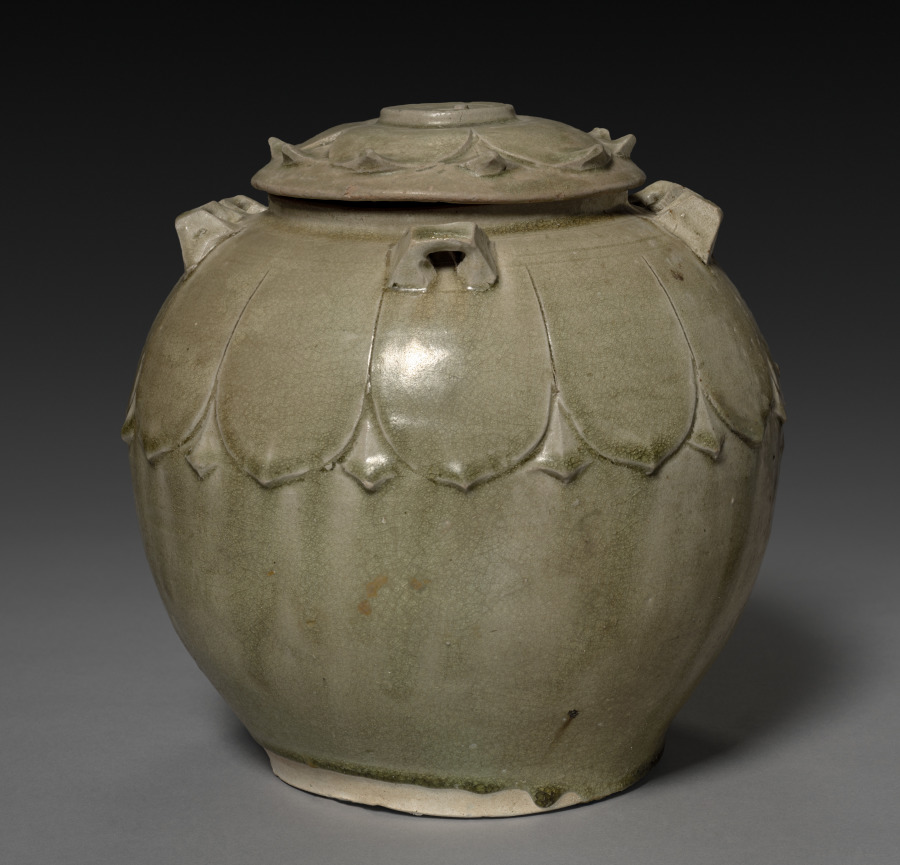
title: Covered Jar with Carved Lotus Petals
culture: China, Northern Dynasties period (386-581)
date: 386–581 CE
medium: Glazed stoneware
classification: Ceramic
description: This jar still has its original cover, which is rare among surviving examples. Its missing knob most likely had the shape of a lotus bud. Beautifully carved lotus petals cover the vessel’s shoulder and lid under a translucent green glaze. In Buddhism, the lotus is a flower symbolizing purity and detachment from worldly affairs; its presence suggests that this vessel was meant to be used in a religious context. The well-crafted double loop handles may have held a silk cloth or other textile that would have been folded over the lid to keep it in place. This aesthetic prefigures the celebrated green celadons in adjacent regions.